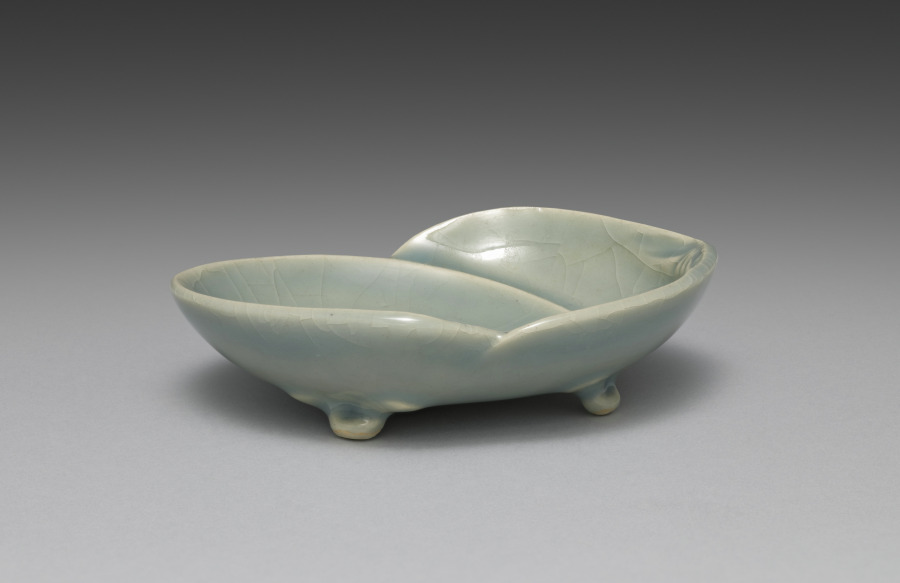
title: Dish from Saucers with Matching Shells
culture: Japan, Meiji period (1868–1912)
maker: Seifū Yohei III (Japanese, 1851–1914)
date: 1893–1914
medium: Porcelain with molded design and green crackled glaze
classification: Ceramic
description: Yohei III’s main output for his sophisticated clientele was in the form of tea sets and dining sets. He created a range of dishes in green glazes. He often produced in pairs, sets of five, or sets of ten. The set of five dishes with a more complex form is described as having a “water-colored glaze” (mizuiroyū). These are shaped like clam half shells, a reference to a game in which shell halves painted with narrative scenes or a variety of motifs must be matched back together by the players. The dishes have molded details to articulate the shell forms, and the crackling across each shell adds another dimension to the surface. Each dish is set on three small feet, formed by a pinched piece of clay and attached to an unglazed area on the underside of the dish. Curiously, while four of the dishes are stamped with the artist’s mark, one has instead a signature carved into the base.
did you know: Each of the paired-shell dishes has its own compartment in a long, flat box.